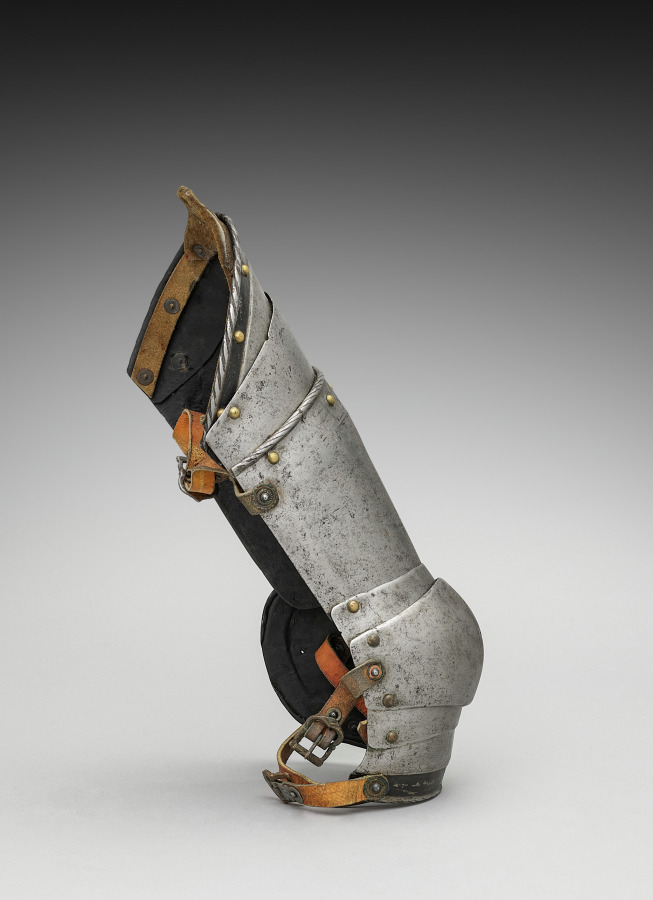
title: Left Cuisse with Poleyns (knee-cops)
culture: Germany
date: c.1550–1570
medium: iron, steel, leather and brass rivets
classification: Arms and Armor